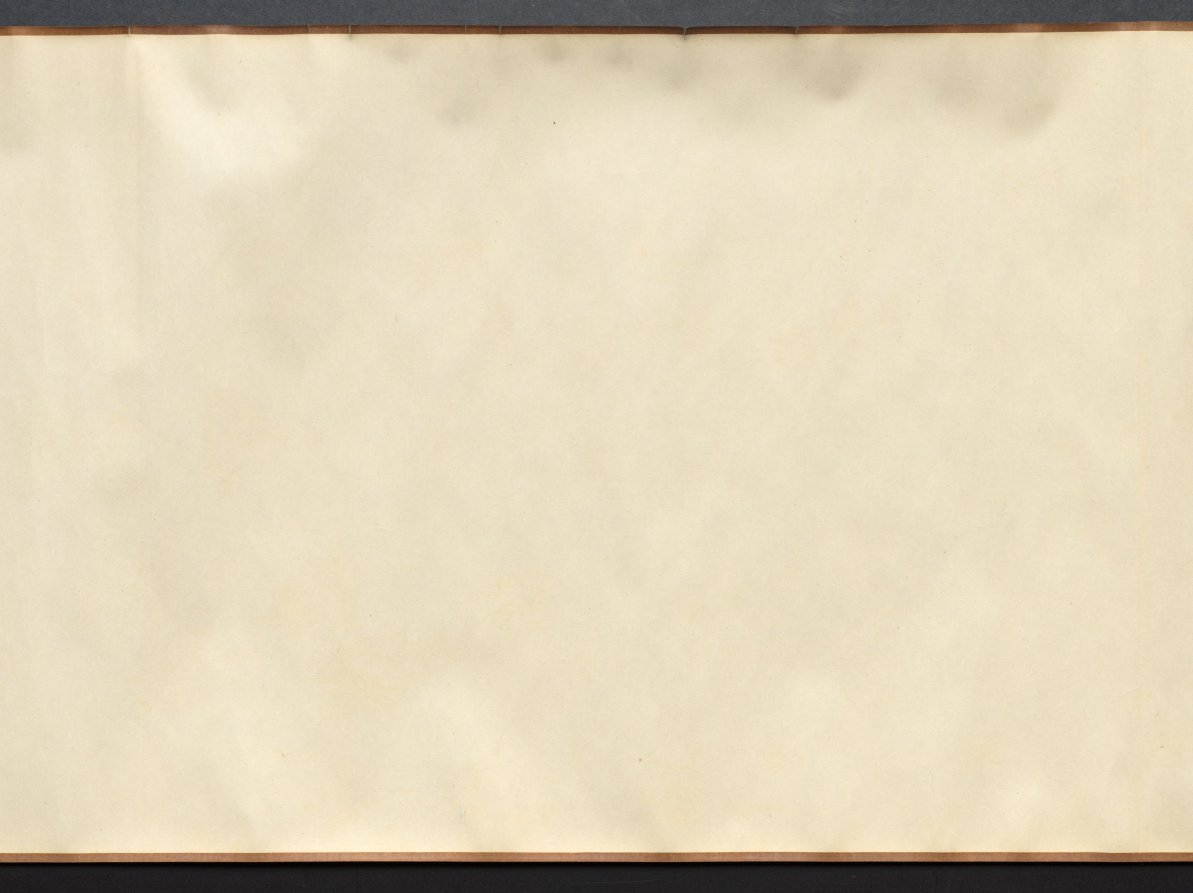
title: Returning to the Village in a Rainstorm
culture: China, Ming dynasty (1368–1644)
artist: Xie Shichen (Chinese, 1487–after 1567)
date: 1530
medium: Handscroll; ink and light color on silk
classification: Painting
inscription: 風雨歸村圖 嘉靖庚寅秋日樗仙謝時臣. [印] 謝時臣印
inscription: 3 additional seals unidentified.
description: This scroll depicts a wind- and rainswept landscape with figures in the countryside struggling against a late summer monsoon rainstorm. Such weather was familiar to residents of the lower Yangzi delta. Xie Shichen spent most of his life in the Suzhou area. Details of his career are scant, but his surviving works suggest that he made his living as a professional painter. This painting conveys drama and anecdotal observations, characteristic of Zhe school paintings, such as the one by Lü Wenying, CMA 1970.76.